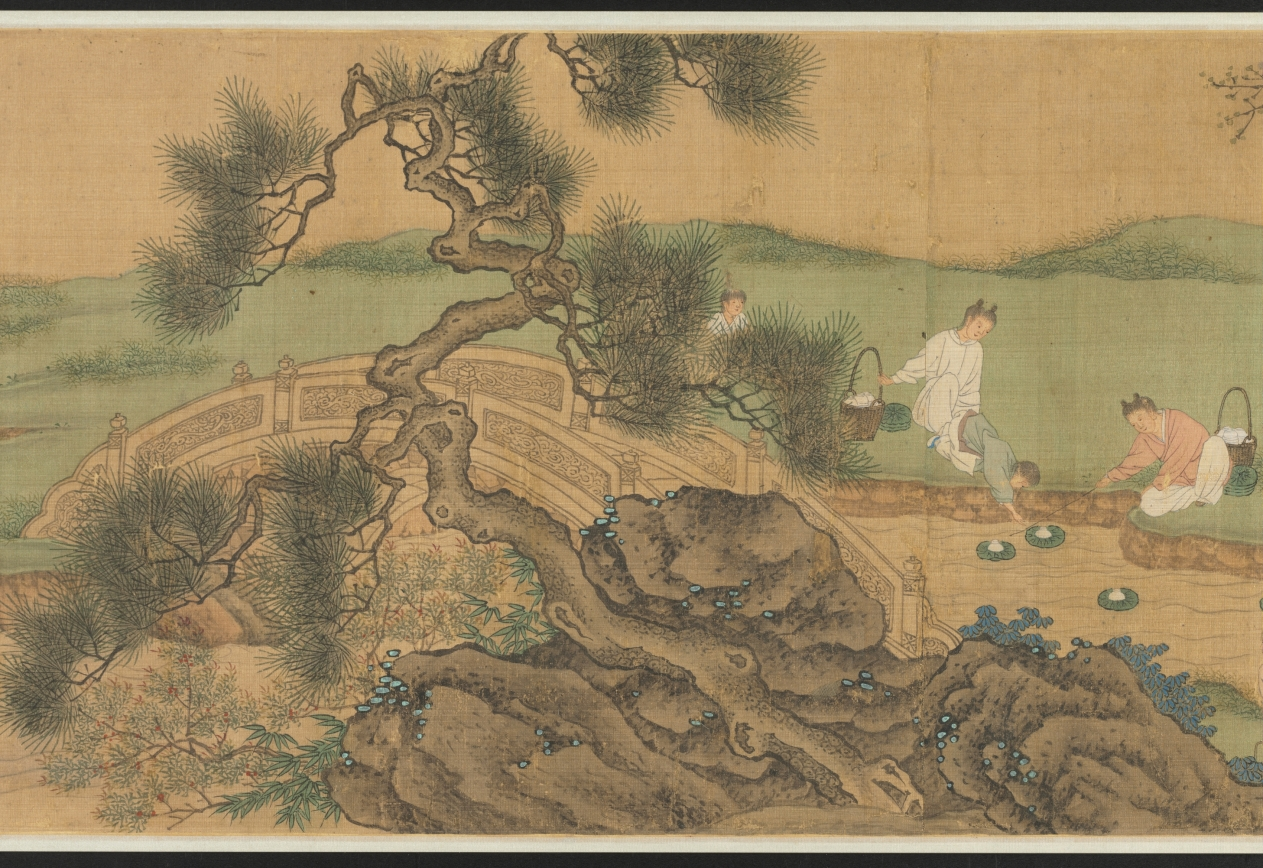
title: Purification at the Orchid Pavilion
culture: China, Qing dynasty (1644-1911)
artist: Fan Yi (Chinese, c. 1615–before 1688)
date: 1671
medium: Handscroll; ink and color on silk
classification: Painting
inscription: Artist's inscription, signature, and 2 seals: Painted by Fan Yi of Zhongfu during the second month of winter of the xinhai year [1671]. [2 seals] Fan Yi zhi yin, Zi yu yi.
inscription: Title on the frontispiece by Monk Yueshan (1629-1709).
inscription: 3 colophons and 13 additional seals: 1 colophon, dated 1707, and 6 seals of Yueshan; 2 colophons and 3 seals of Wong Kwan-Shut (Huang Junshi) 黃君實 (b. 1934); 2 seals of Fu Shen 傅 申 (b. 1937); 2 seals of Tessai Tomioka 富岡鐵齋 (1836-1924).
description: By the 1600s, the historic gathering at Lanting, Zhejiang province, in 353 CE was a common theme in Chinese painting. Originally based on a composition attributed to Li Gonglin (1049– 1106), now lost, Wu school artists revived the theme. Fan Yi, the brother of the artist Fan Qi from Nanjing, used delicate brushwork and luminous colors to depict the spring gathering.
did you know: The gathering’s host is in the Orchid Pavilion at the end of the scroll, representing an episode known as “Wang Xizhi Watching the Geese 王羲之觀鵝圖.”